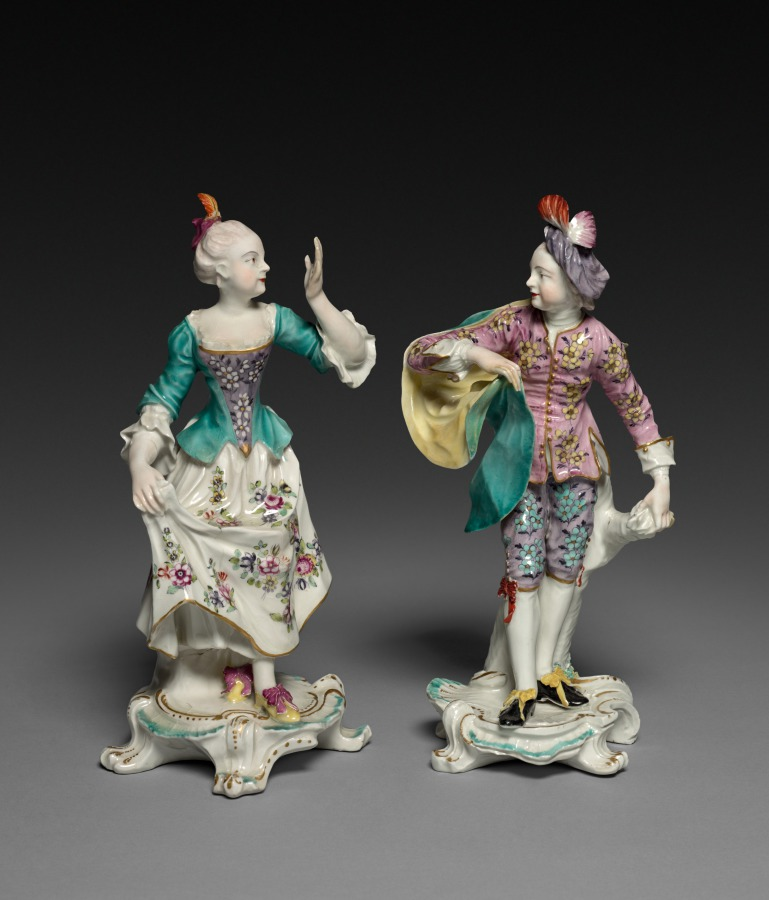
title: Dancers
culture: England, Derby, 18th century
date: c. 1760–1765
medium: soft-paste porcelain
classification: Ceramic